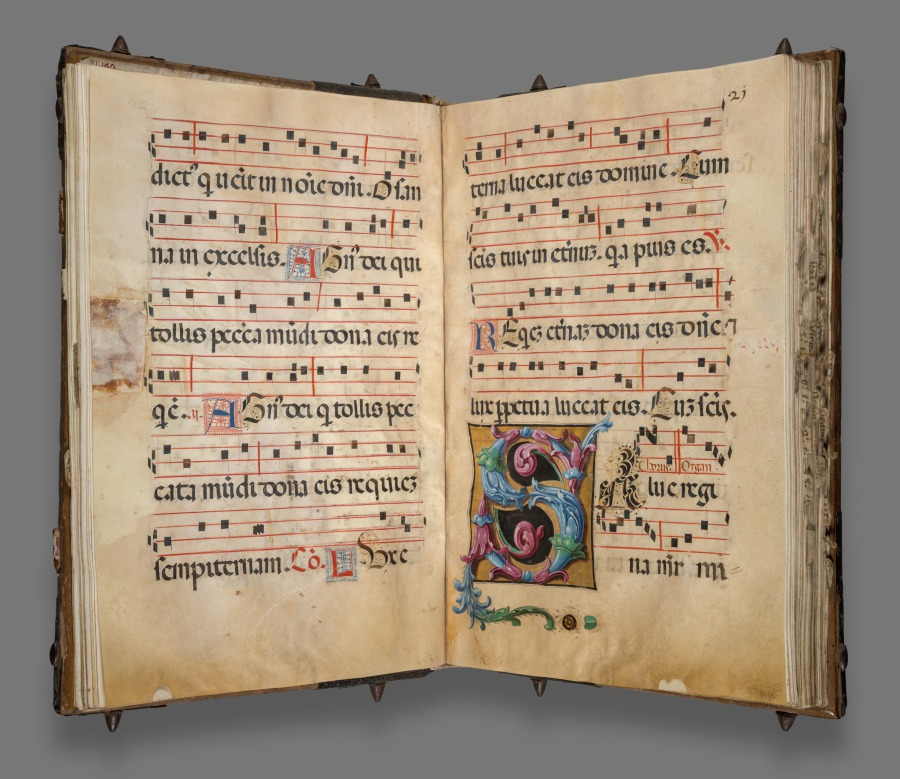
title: Gradual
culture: Italy, Verona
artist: circle of Girolamo dai Libri (Italian, 1474–1555)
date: c. 1520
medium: ink, tempera, and gold on parchment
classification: Manuscript